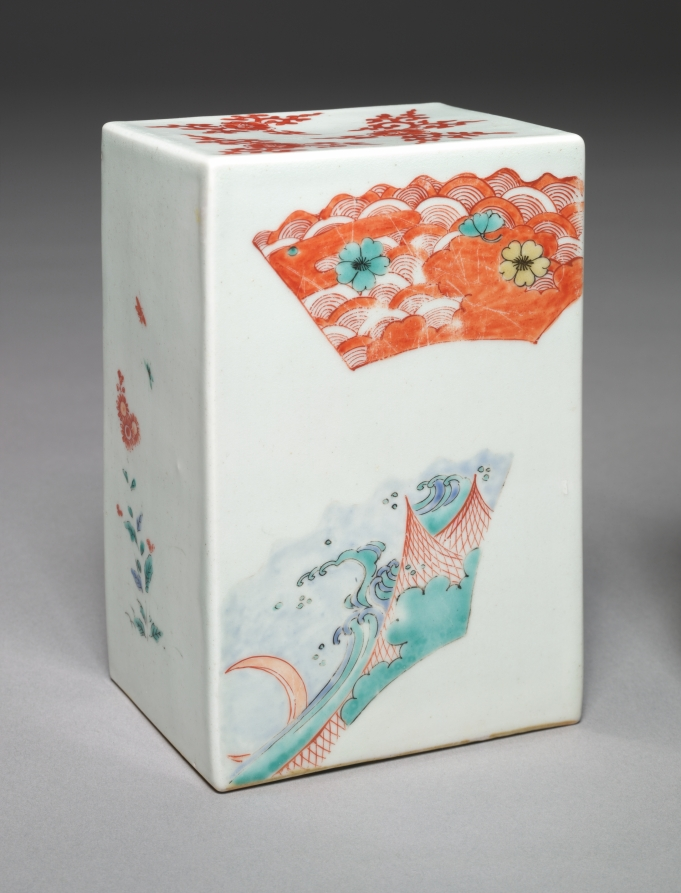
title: Pillow with Fan and Floral Decoration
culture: Japan, Edo period (1615–1868)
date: late 1600s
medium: porcelain with overglaze color enamel (Hizen ware, Kakiemon type)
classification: Ceramic